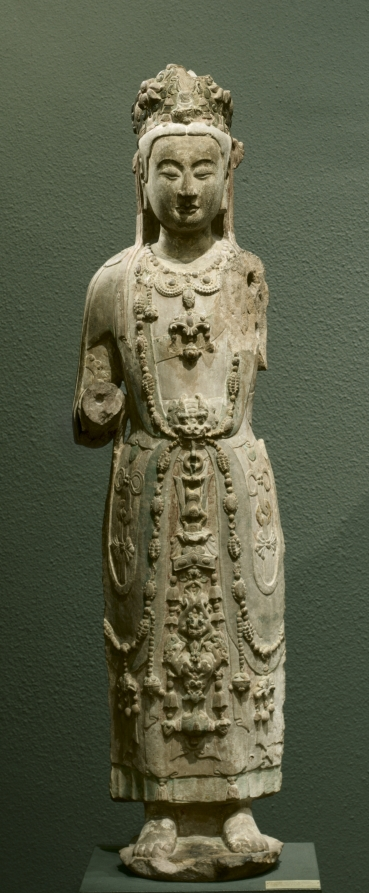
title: Bodhisattva Guanyin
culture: China, late Northern Qi (550–577) or early Sui dynasty (581–618)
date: late 500s–early 600s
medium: sandstone with polychromy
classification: Sculpture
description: The artistic excellence of this bodhisattva is further reinforced by comparable outstanding Chinese Buddhist sculptures excavated at Qingzhou in Shandong Province in 1996—one of the most sensational and significant archaeological finds of the 1900s. Like related types among the Qingzhou finds, this statute has a gently smiling face and meticulous detailing of splendid jewelry. A noticeable difference, however, is the unique yingluo 瓔珞 (mukt hara) worn by the bodhisattva for personal adornment. The somewhat bizarre but imaginative combination of a string of jewels with grotesque animal masks, flying apsara, jade pendants, dragons, and metal ornaments was probably a regional decorative style of Shanxi Province.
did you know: The carved and painted back suggest that the bodhisattva was originally displayed where it could be viewed in the round.